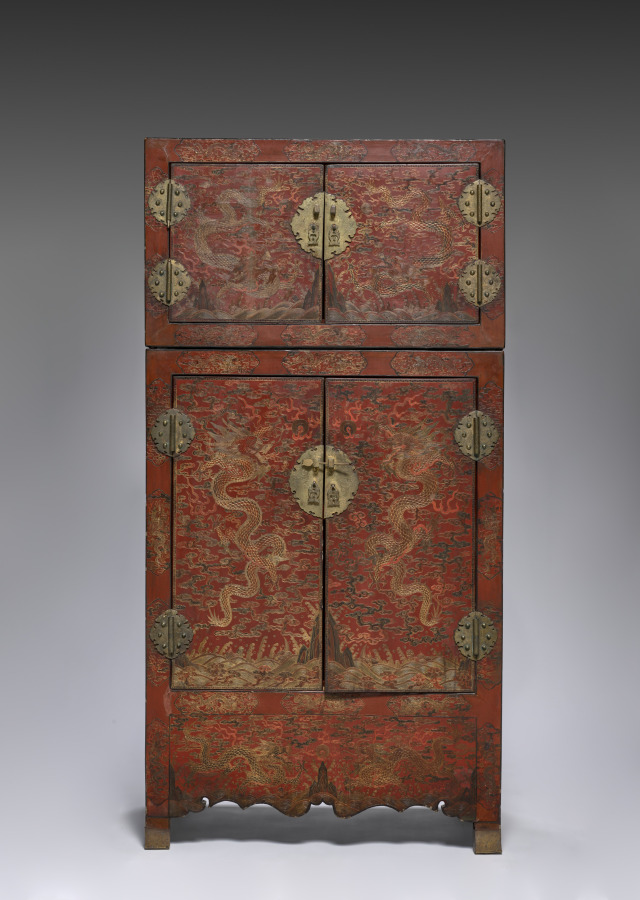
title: Double Cabinet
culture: China, Ming dynasty (1368-1644) - Qing dynasty (1644-1911)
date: 1600s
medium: red lacquer on wood with pigment and gilding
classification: Furniture and woodwork